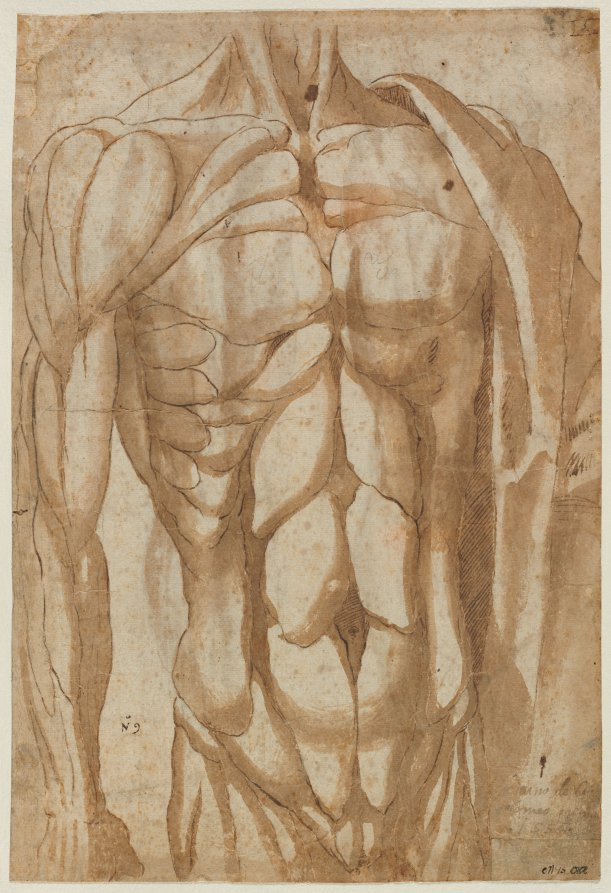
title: Study of a Flayed Torso (verso)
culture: Italy, 16th century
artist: Bartolommeo da Arezzo (Italian, active about 1550–80)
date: 1554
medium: pen and brown ink and brush and brown wash over traces of black chalk; incised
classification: Drawing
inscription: signed, lower right, in brown ink: demano de bar / tolomeo aretino / 1554 ; by artist(?), upper right, in brown ink: [5?] [over- and underlined] ; by artist(?), lower left, in brown ink: N° 9 ; by artist(?), lower right, in brown ink: [N. 15?]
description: In order to understand the movement of the human form, Michelangelo was known to have studied flayed bodies (cadavers with their skin removed) and in fact made several drawings of them. Bartolommeo da Arezzo—a follower of Michelangelo working a generation after the master—became obsessed with studying corpses, even stealing them from local graveyards. On one side of this sheet (verso), he drew a flayed torso.